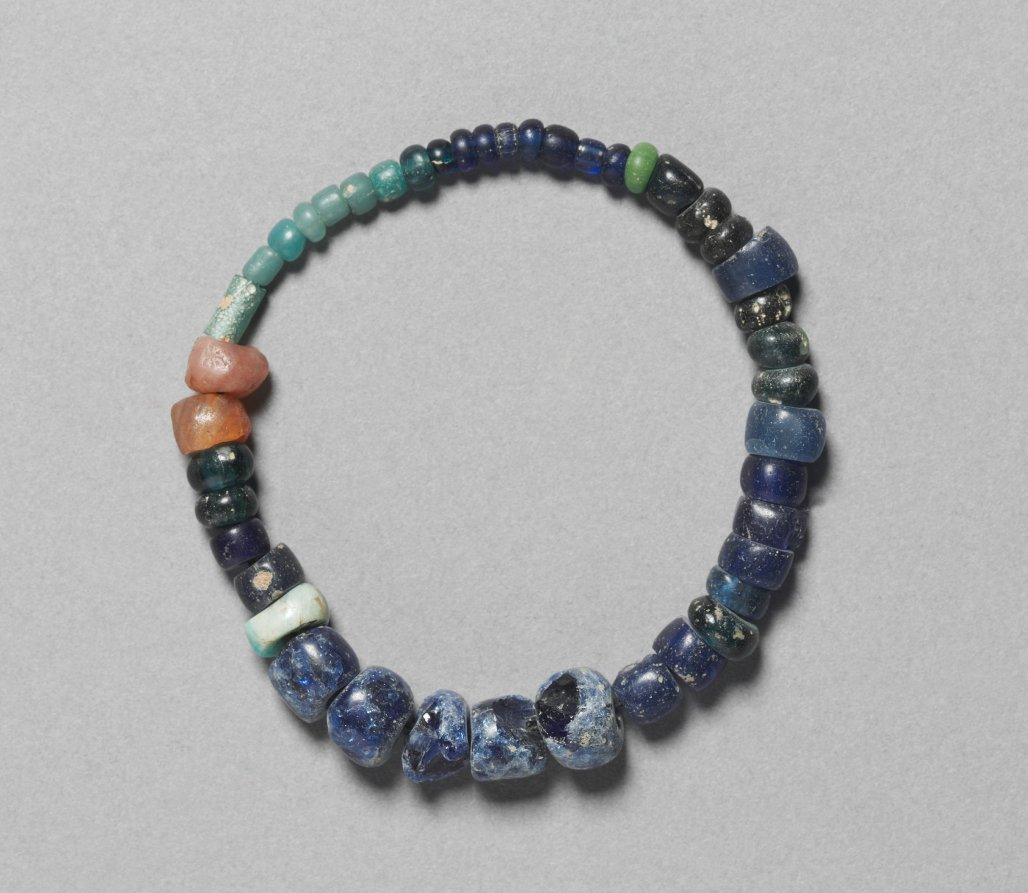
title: String of Glass Beads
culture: Korea, Three Kingdoms period (57 BCE–668 CE)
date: 400s CE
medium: glass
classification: Jewelry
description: An enormous amount of beaded strings and necklaces were excavated from Silla tomb sites. Glass, largely produced in ancient Rome since the late 1st century, also reached the Korean peninsula through the Silk Road, the ancient global trade route. Yet cobalt blue glass beads shown in this string are highly likely to be soda glass produced in the Silla territory.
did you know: Glass, largely produced in ancient Rome since the late 1st century, also reached the Korean peninsula through the Silk Road, the ancient global trade route. Yet, cobalt blue glass beads shown in this work are highly likely to have been produced in the Silla territory.